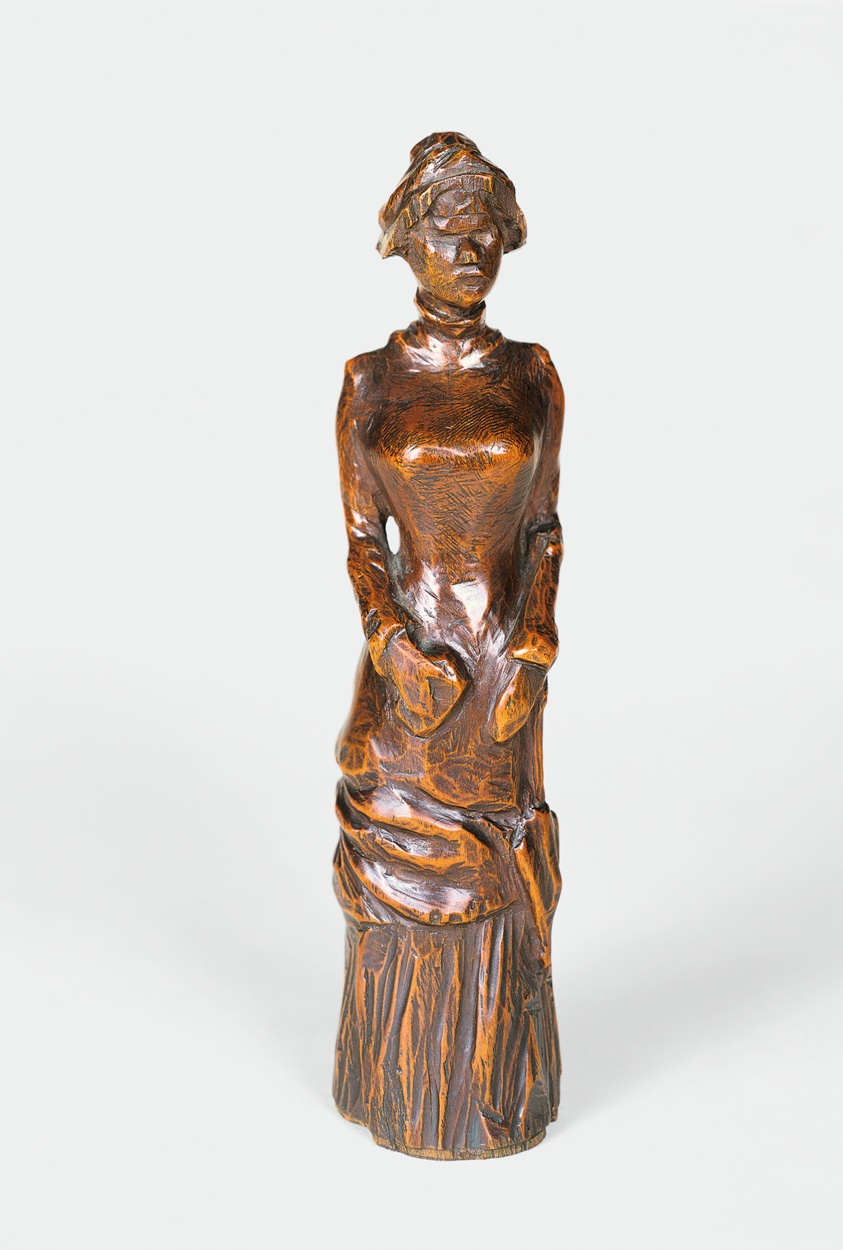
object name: Sculpture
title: Woman Strolling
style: 19th century, Post-Impressionism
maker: Paul Gauguin (French, 1848–1903)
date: c. 1880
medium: Tropical laurel (Terminalia), stained red and black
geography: France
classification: sculpture; european decorative arts; france; french; wood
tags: woman, figure, black (color), red (color), wood, sculpture, fashion, walking